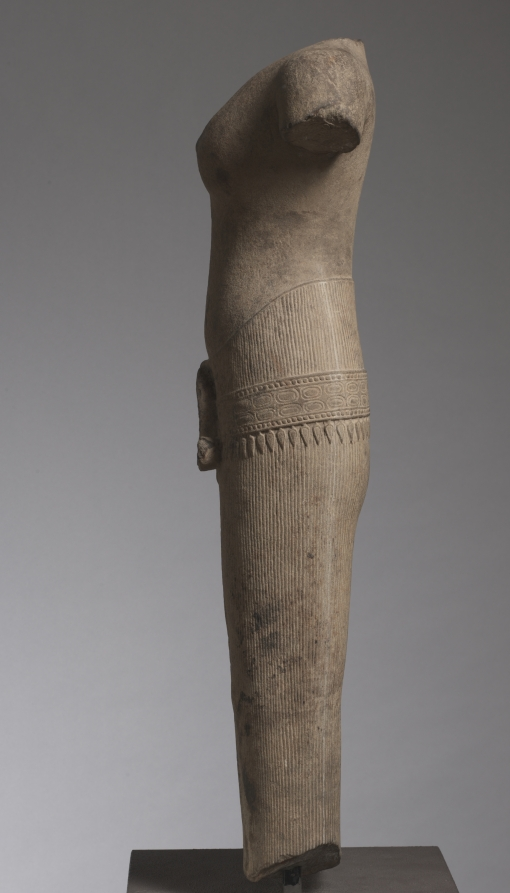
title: Standing Female Figure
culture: Cambodia, Angkor, Baphuon, Angkorean Period (877-1431)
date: 1050–75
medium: sandstone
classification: Sculpture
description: Though many iconographic elements were adopted from India, Khmer sculptors resisted the exaggerated voluptuous form of Indian female figures. They maintained the subtler figural styles that convey a distinctively Khmer ideal of the female form. This sculpture exemplifies the figural style and mode of dress of the Baphuon sculptures, a royal temple in Angkor built by King Udayadityavarman II (reigned 1050-1066). Since other figures from the Baphuon depict images of or related to Shiva, it is possible to identify this female figure as his wife Parvati.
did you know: The figure wears an elaborate belt decorated with pendants around her sarong.